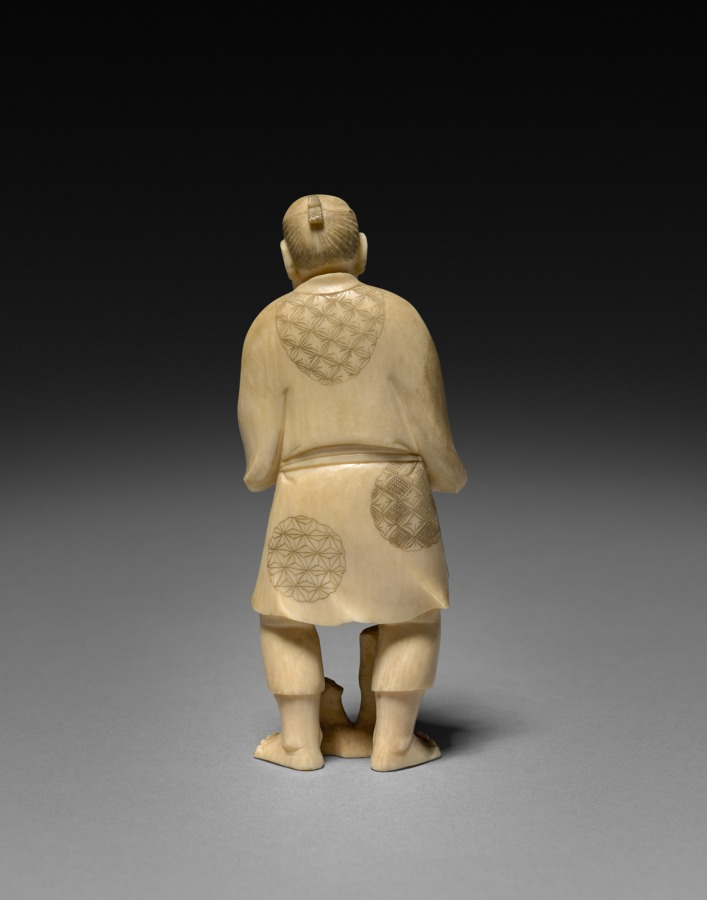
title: Man Holding Fruit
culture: Japan, Meiji period (1868–1912)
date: early 1900s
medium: ivory, pigment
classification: Ivory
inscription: 光江